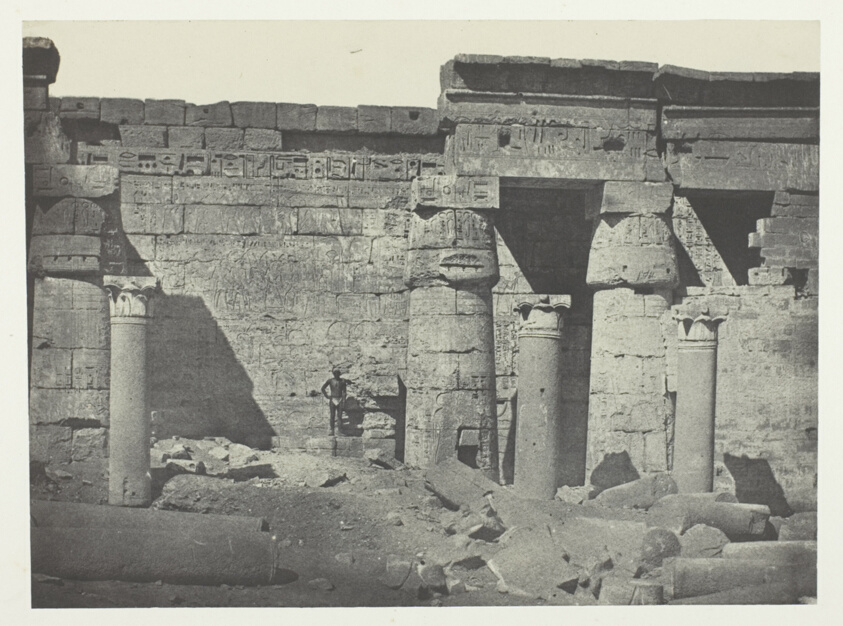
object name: Photograph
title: Médinet-Habou, Péristyle du Palais de Ramsès-Méiamoun; Thèbes, plate 50 from the album "Egypte, Nubie, Palestine et Syrie" (1852)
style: 19th century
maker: Maxime Du Camp (French, 1822–1894)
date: 1849/51, printed 1852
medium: Salted paper print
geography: France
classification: salted paper print; photographic process; photography; photograph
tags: Collected by Hugh Edwards, Egypte, Nubie, Palestine et Syrie